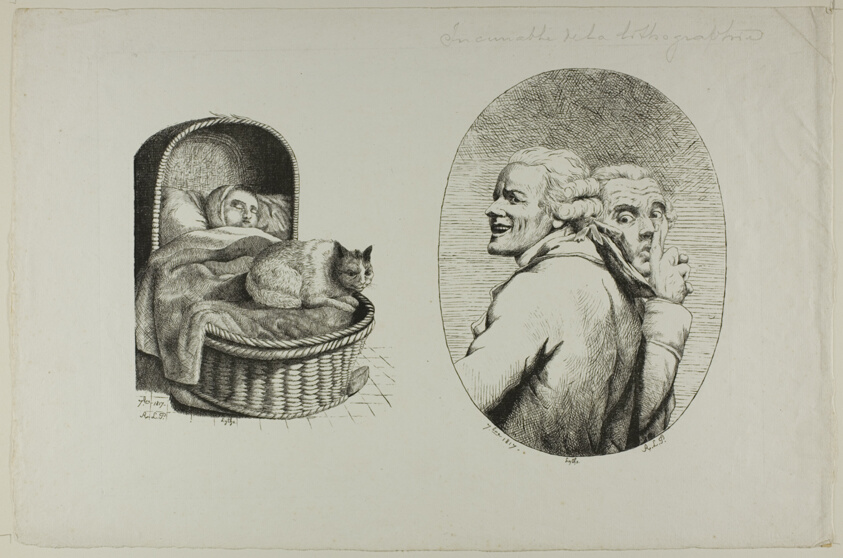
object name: Print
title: Child in a crib and Jeux de physionomie after Ducreux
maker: Monogrammist A.L.P. (probably French, 18th-19th centuries)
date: September 1817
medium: Lithograph in black on ivory laid paper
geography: France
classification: lithograph; print; prints and drawing